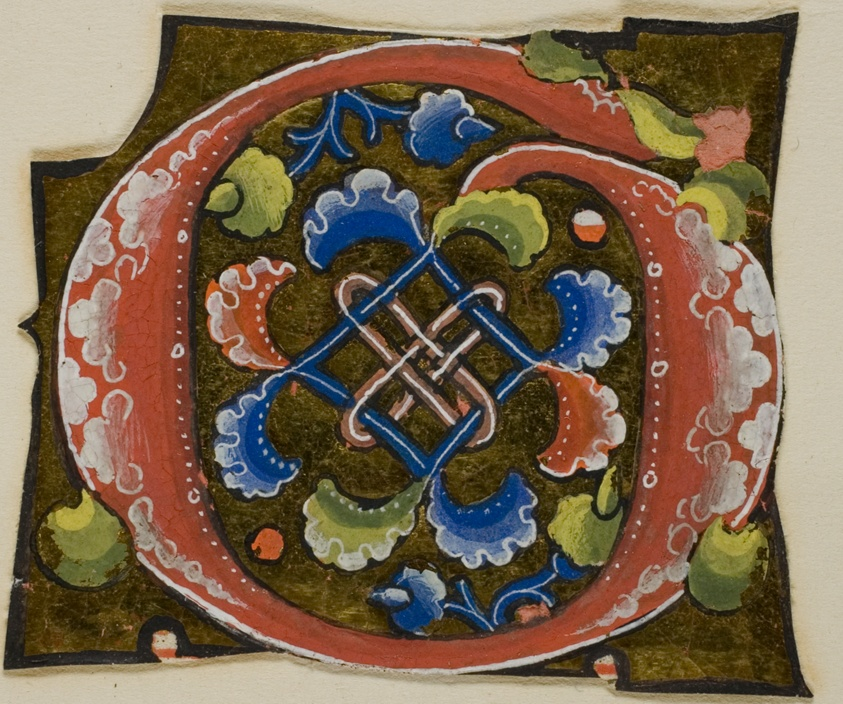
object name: Drawing and Watercolor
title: Decorated Initial "G" in Red with Conventional Flower from a Manuscript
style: medieval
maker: European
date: 14th century or modern, c. 1920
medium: Manuscript cutting in tempera and gold leaf on vellum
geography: Europe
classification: tempera; manuscript; drawings (visual works); prints and drawing